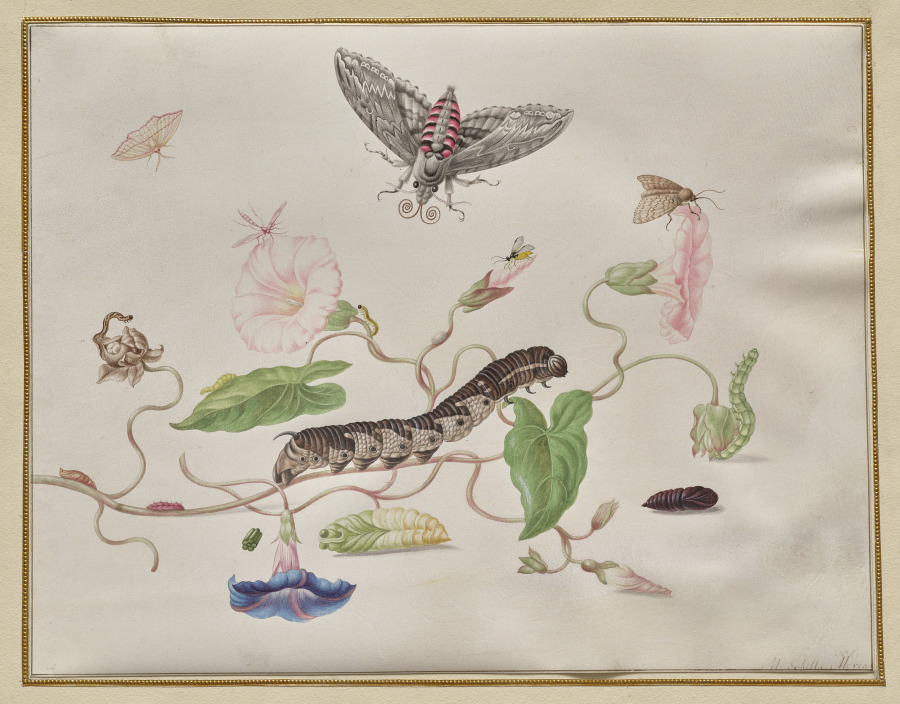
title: Convolvulus and Metamorphosis of the Convolvulus Hawk Moth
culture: Netherlands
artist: Maria Sibylla Merian (German, active Netherlands, 1647–1717)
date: c. 1670–90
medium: watercolor with touches of opaque watercolor over indications in black chalk or graphite on vellum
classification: Drawing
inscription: recto, signed, lower right in brown ink: M. Sybilla Merian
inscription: inscribed lower right above signature in graphite: No 61 and lower left in graphite A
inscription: on mount, brown ink, Surinamse Liguster pylstaart Uyl met de Rups en sop and No. 45. A. and Sibilla Merian fecit 1670.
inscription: on mount, underneath sheet, inscribed, brown ink, Sibilla Merian fe.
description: The artist Maria Sibylla Merian was one of the most important entomologists of the 17th century. Her studies of caterpillars, which she reared herself, contributed to knowledge of the life cycles of numerous species. Trained as a miniature painter by her stepfather, she combined her artistic talent with her scientific interest, creating images such as this one, which portrays the life cycle of the European pink-spotted hawk moth as well as its favorite food, the morning glory. Merian added additional caterpillar species to the sheet to create a pleasing and astonishingly detailed composition.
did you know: The artist who drew this life cycle of the European pink-spotted hawk moth from egg through caterpillar, pupa, and adult insect reared caterpillars in her home for 10 years before writing and illustrating a definitive text on metamorphosis.